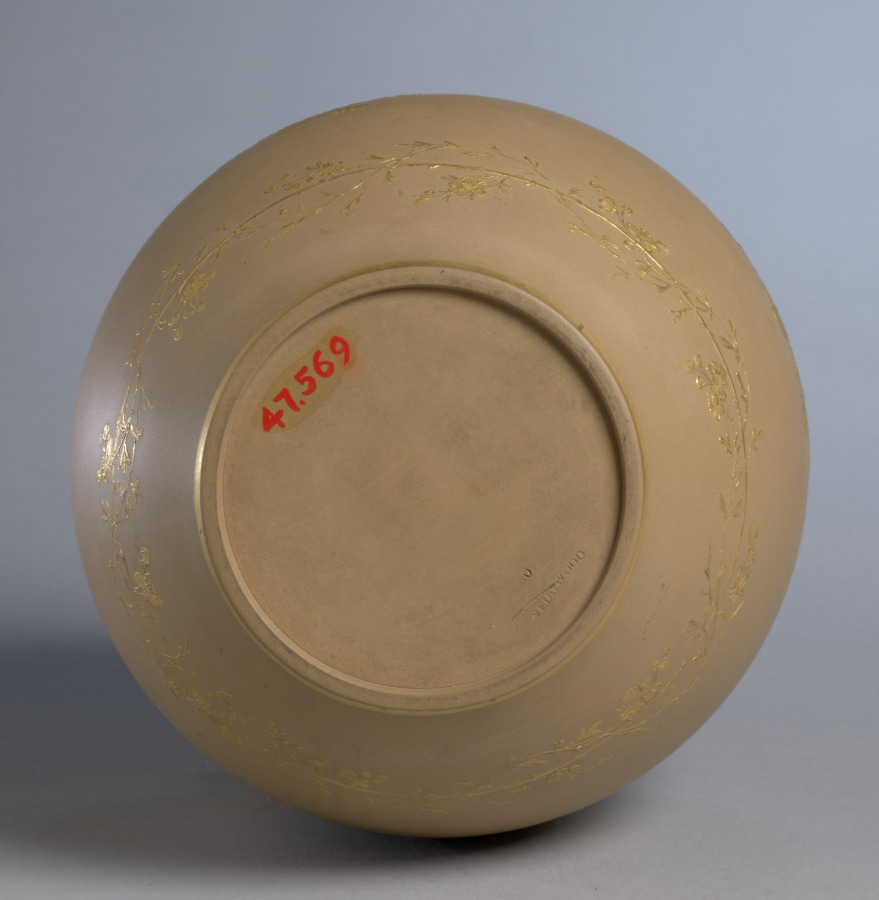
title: Vase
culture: England, late 19th Century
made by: Wedgwood Factory (British)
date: late 1800s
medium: ceramic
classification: Ceramic